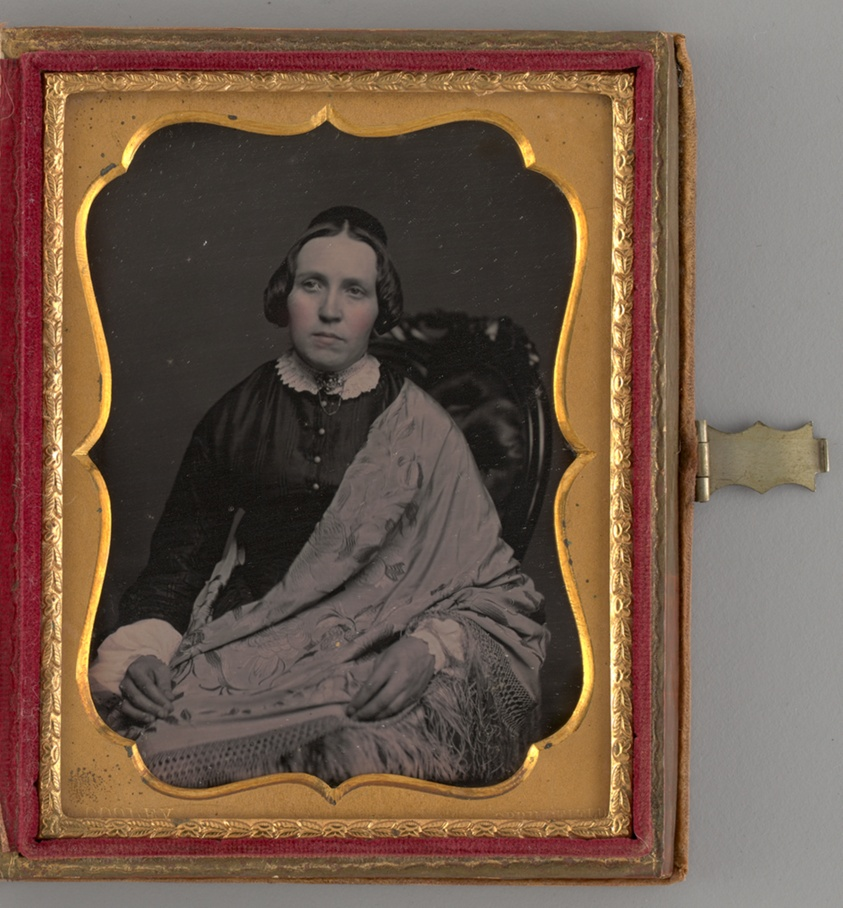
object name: Photograph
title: Untitled (Portrait of a Seated Woman)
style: 19th century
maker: Otis H. Cooley; American, 1820-1860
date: 1858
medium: Daguerreotype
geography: United States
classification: portrait; photograph; photographic process; photography; portrait; daguerreotype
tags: lundberg collection, portraits, portraits: female subject, female, photography, portrait